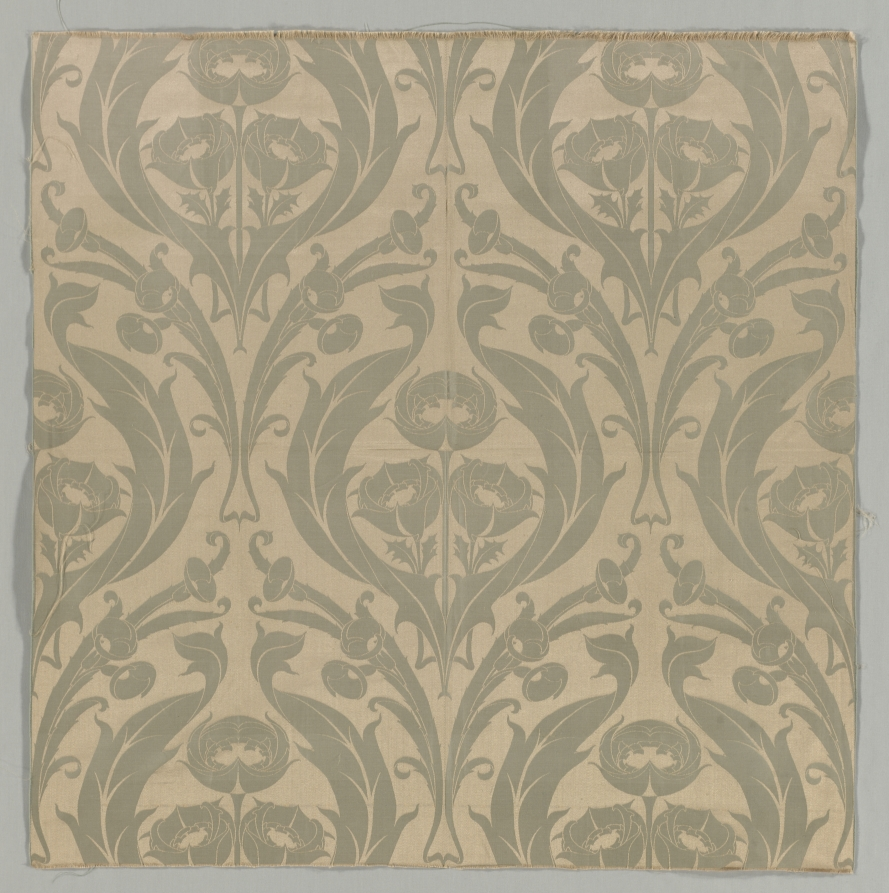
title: Textile Fragment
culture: England, 20th century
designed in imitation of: William Morris (British, 1834–1896)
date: c 1900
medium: silk and cotton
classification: Textile